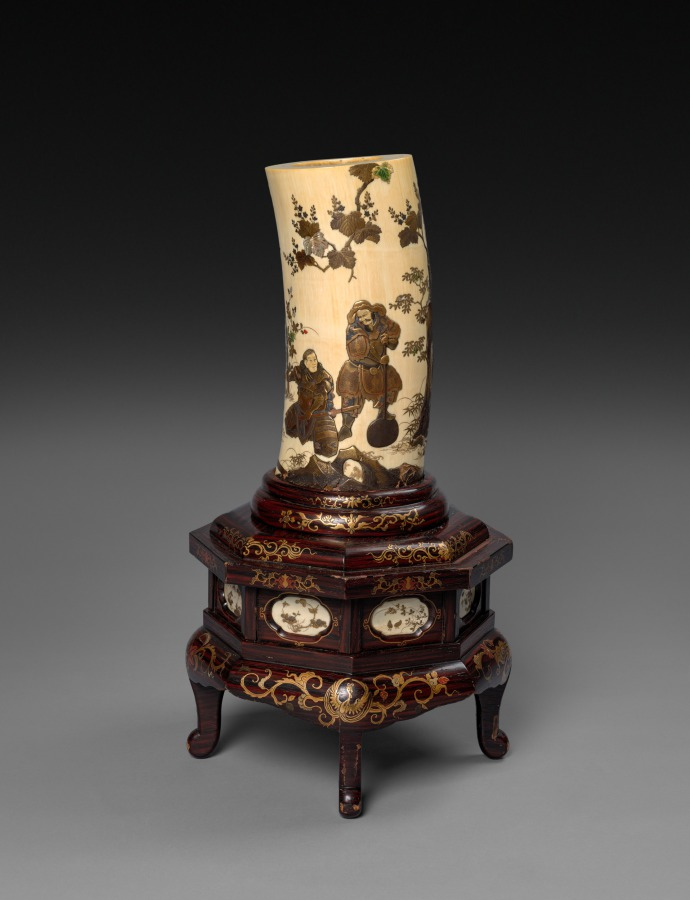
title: Ivory Tusk Vase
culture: Japan, Meiji period (1868–1912)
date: late 1800s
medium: carved ivory, pigment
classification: Ivory